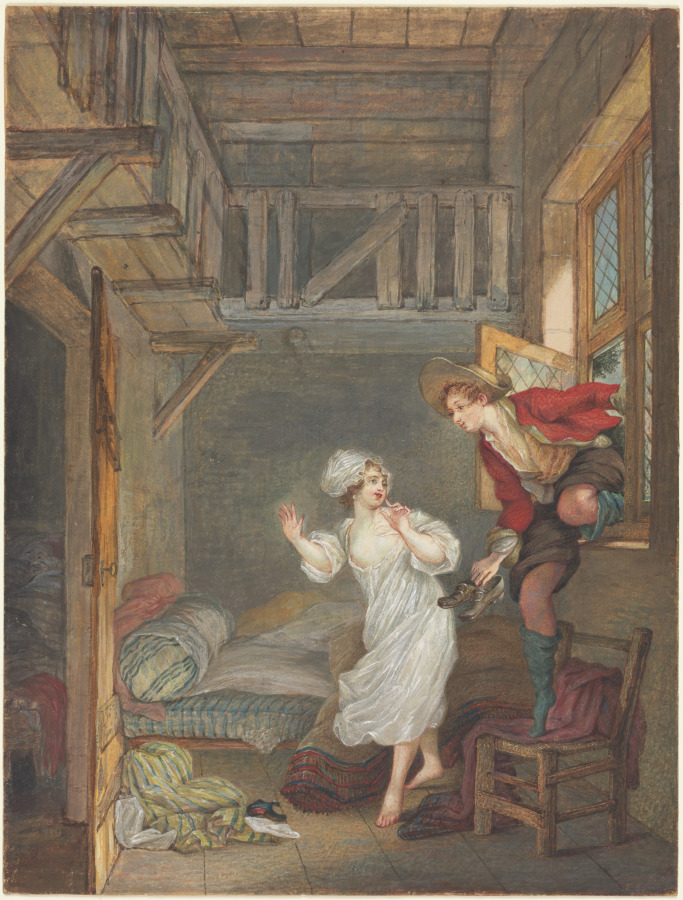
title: The Lover's Visit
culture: France, 18th century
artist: attributed to Pierre-Antoine Baudouin (French, 1723-)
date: c. 1765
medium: Gouache on card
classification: Drawing